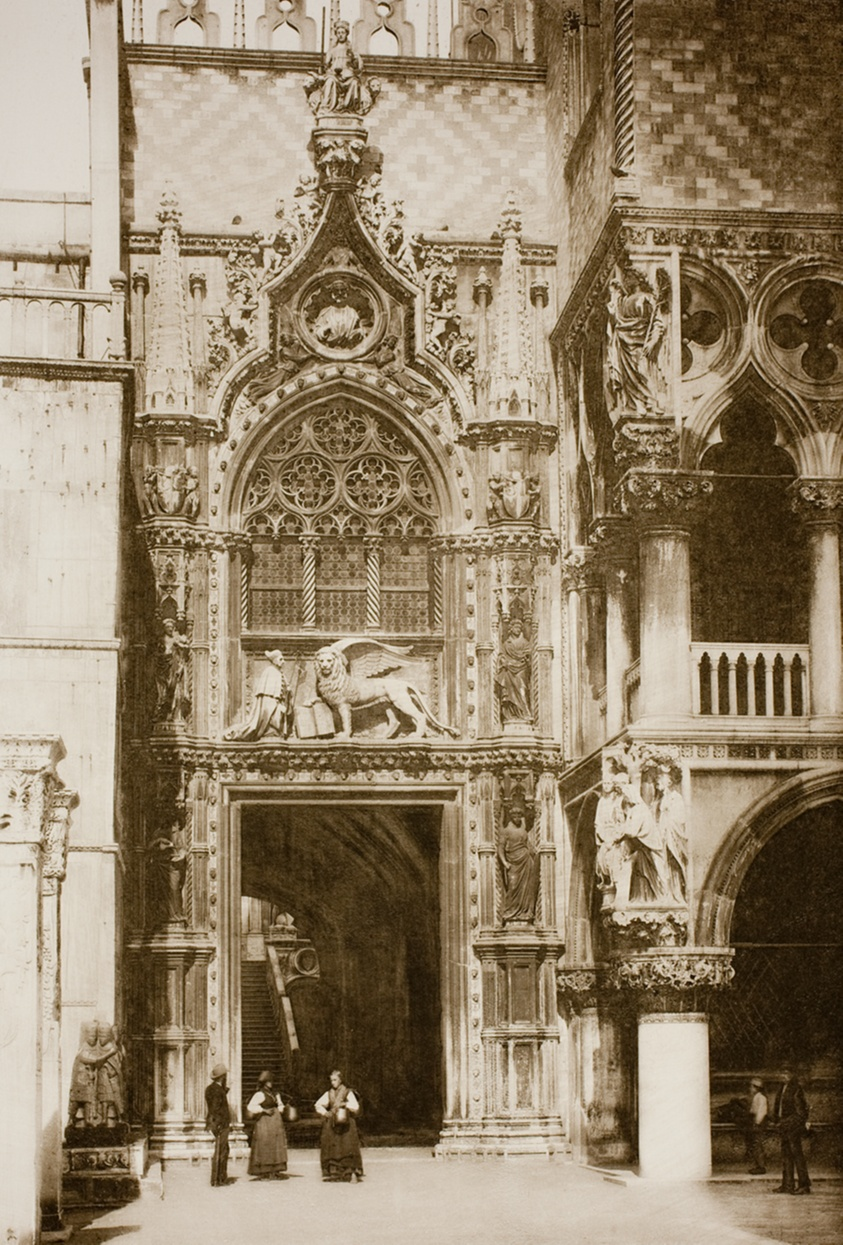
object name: Photograph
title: Untitled (31)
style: 19th century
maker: edited by Ferdinando Ongania; Italian, 1842–1911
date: c. 1890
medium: Photogravure, No. 31 from the portfolio "Calli, Canali e Isole della Laguna"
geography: Italy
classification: photograph; photography